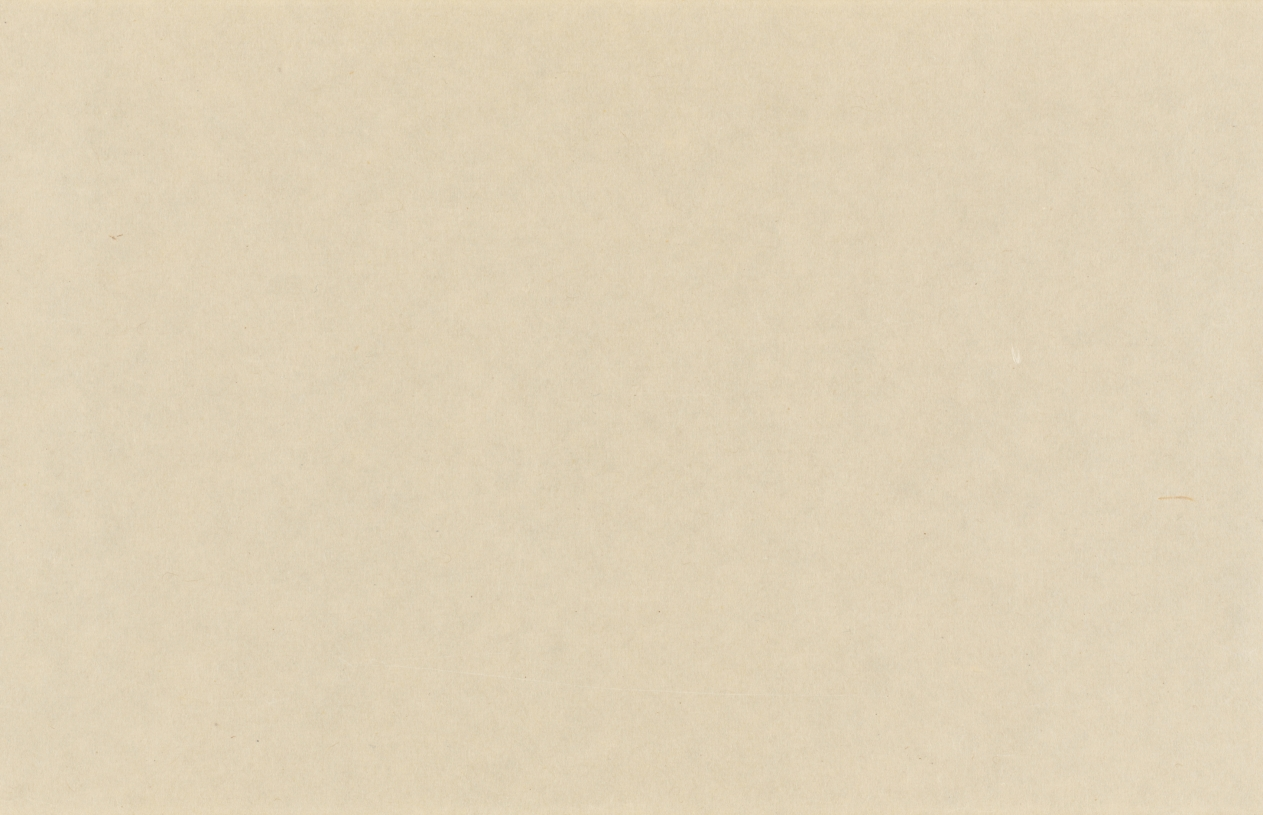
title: Eight Views of Xiao-Xiang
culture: Japan, Muromachi period (1392–1573)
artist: Sesson Shūkei (Japanese, c. 1492–c. 1577)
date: 1500s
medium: handscroll; ink on paper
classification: Painting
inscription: Signature and seal of artist at end of painting.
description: Eight Views of the Xiao and Xiang Rivers can be traced to 11th-century Chinese poems and paintings, the depiction of which had also become popular among Korean and Japanese painters. Xiao-Xiang refers to the region in present-day Hunan province where the Xiao and Xiang rivers converge. Few painters of the Eight Views had in fact seen the scenery; rather, they were trying to portray in ink and wash the lyrical qualities of dim light and a misty atmosphere typical of that region. Each of the poetic titles suggests a time of day, a season, or specific atmospheric conditions—subjects that challenged the abilities of the most talented artists. In this miniature painting (shukuzu) of the Muromachi period, Japanese Zen monk and painter Shukei Sesson depicted all eight views featured in Chinese prototypes: Wild Geese Descending to Sandbar; Returning Sails Off a Distant Coast; Mountain Market in Clearing Mist; River and Sky in Evening Snow; Autumn Moon over Dongting Lake; Night Rain on the Xiao and Xiang; Evening Bell from Mist-Shrouded Temple; and Fishing Village in Evening Glow.